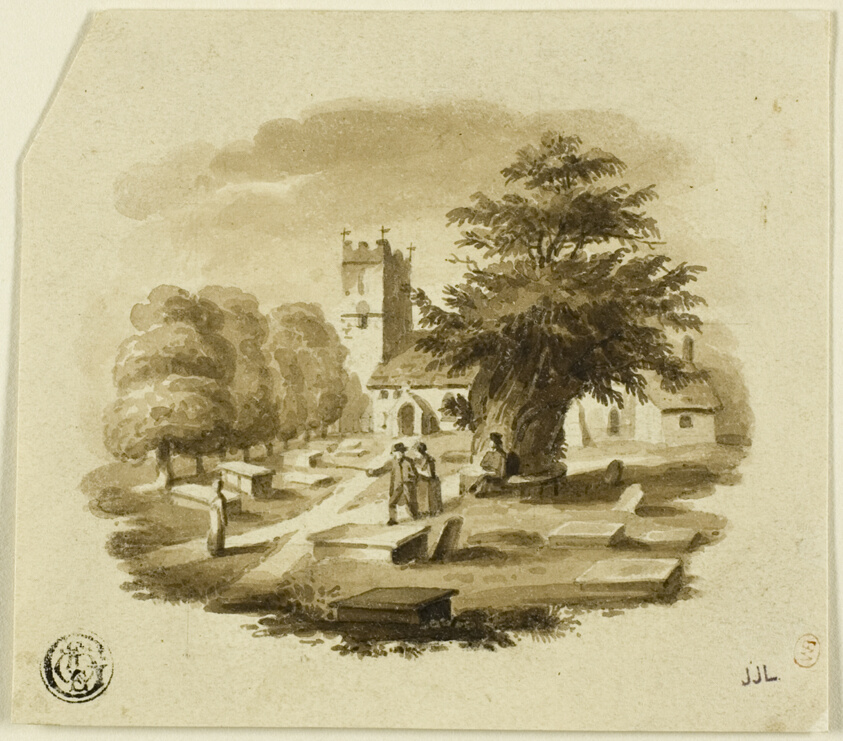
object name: Drawing and Watercolor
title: Figures in Cemetary Near Church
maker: Attributed to Charles Alfred Stothard; English, 1786-1821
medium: Brush and brown wash, over traces of graphite, on ivory wove paper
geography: England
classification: ink or chalk wash; drawings (visual works); prints and drawing